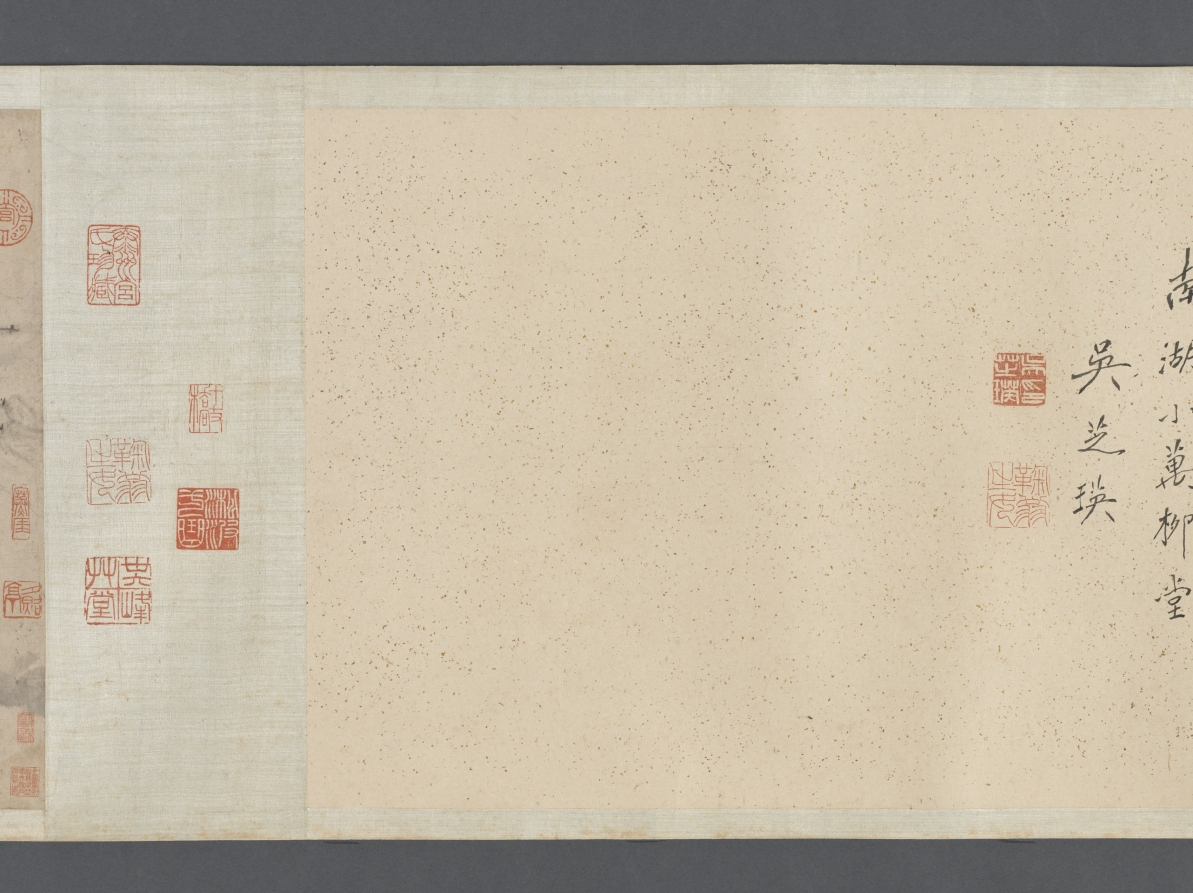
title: Spring Rain Thatched Hut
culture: China, Qing dynasty (1644-1911)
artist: Wang Jianzhang (Chinese, active 1621–1662)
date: 1650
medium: handscroll, ink on paper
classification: Drawing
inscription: Title by Wu Zhiying 吳芝瑛 (1868–1933), dated 1910.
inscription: 春雨草堂圖。庚寅仲春，為紫玄社兄畫於若耶溪上。 仲初王建章。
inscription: 12 colophons by Gong Weiliu’s 宮偉鏐 (1611–1680) contemporaries: Fang Gongqian 方拱乾 (1596–1667, jinshi of 1628); Jiang Cai 姜埰 (1607–1673); Liang Yizhang 梁以樟 (1608–1665); Du Shaokai 杜紹凱 (also named Du Jie 杜岕, 1617–after 1689), dated 1648; Zhao Kaixin 趙開心 (d. 1663), dated 1647; Zhao Erbian 趙而忭 (d. 1658); Yu Yaoguang 余耀光, dated 1649; Yao Quan 姚佺, dated 1648; Chen Taisun 陳台孫 (b. 1611, jinshi of 1640); (Monk) Shao 韶; Du Zhujin 杜祝進; and Tang Shi 唐時.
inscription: 此研田莊居士王建章為先太史紫元公所作春雨草堂圖也。居士字仲初，明崇禎間人，與先太史及惲香山相友善。喜畫佛像，自謂不讓李公麟。山水祖述董源，筆力雄健，有不可羈勒之概。香山稱其墨有五采，非世人所知。然性廉重，非同志不輕落筆，人得其寸圖尺縑，必相與忻賞，如獲蜼彝兕敦，非人世間物也！見先太史筆記，此圖寫雨景，而氣韻生動，勃勃於不能止。每一展覽，覺滿紙雲烟，墨瀋猶濕，如寫吾先人胸中未盡之邱壑也。圖後題詠，多一時名手，想見文采風流之盛。迄今二百餘年，舊德先疇，遺風未沫。吾子孫其永寶之，如與吾先人接謦咳於一堂，為感思之助，其敢作圖畫觀乎！同時香山亦有圖佚去己久，不知異日能為延津之合否。壬申長夏本昂重裝敬識。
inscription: Collectors' seals including: Gong Ben'ang 宮本昂 (1821–1874); Lian Qian 廉泉 (1868–1932); Wu Zhiying 吳芝瑛 (1868–1933)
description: With its striking simplicity, this painting captures the pure serenity of a private garden in the moist atmosphere of a spring morning on a small river. Painted in the style of Ni Zan, Wang Jianzhang dedicated this work to his patron-friend Gong Weiliu (1611-1680). Gong retired from government service after the fall of the Ming dynasty and constructed a garden-retreat at his native home in Taizhou, Jiangsu province. He invited scholars and poets from his literary society to contribute writings of his estate, which are here mounted together with the painting in this scroll.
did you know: Gong Weiliu, the owner of the estate portrayed here, had received his prestigious jinshi degree in 1643, but his official career was thwarted by the collapse of the Ming dynasty the following year.